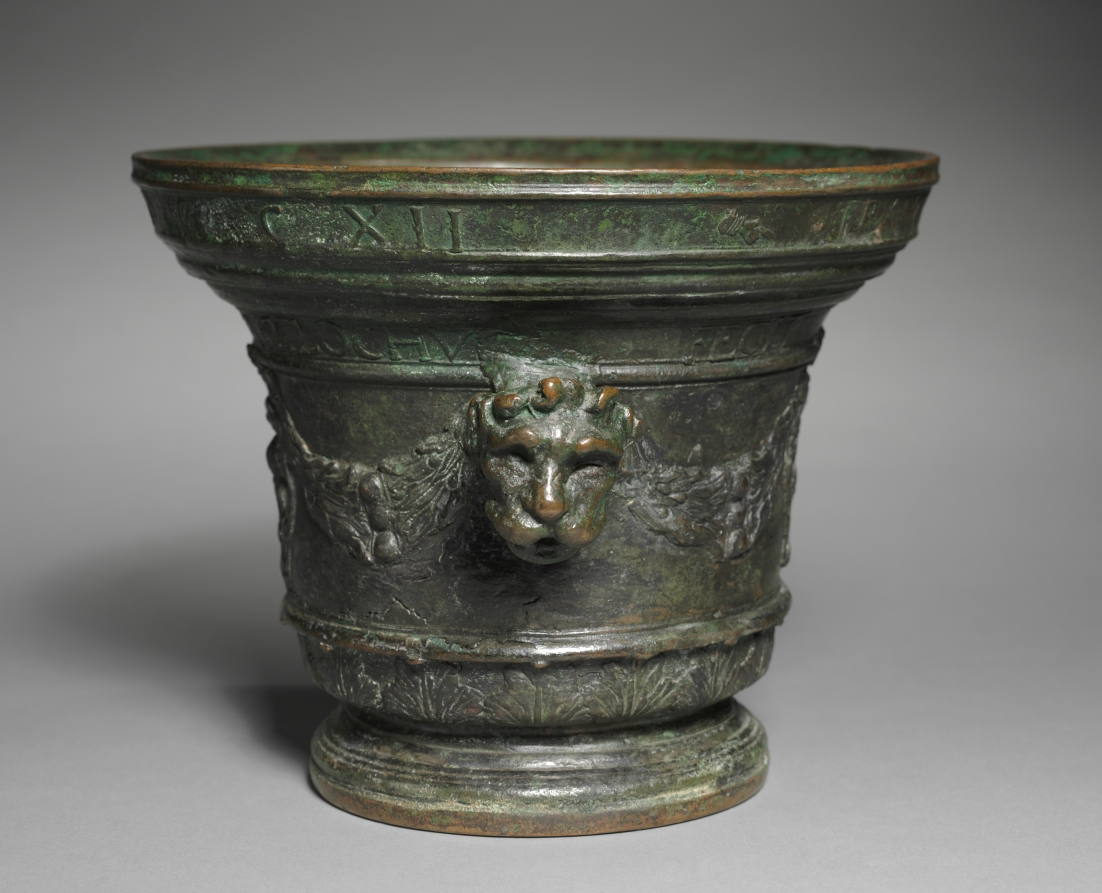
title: Mortar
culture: Italy, 18th century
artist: Georgius Mazzochus (Italian)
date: 1712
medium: bronze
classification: Sculpture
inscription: Inscription on obverse: "ANNO M D C C XII / GEORGIUS MAZZOCHUS / (fleur-de-lis)" Insciption on reverse: "FRANC I . PLAC ET PAR DUX VII / FECIT / (crowned shield with 6 fleur-de-lis)"